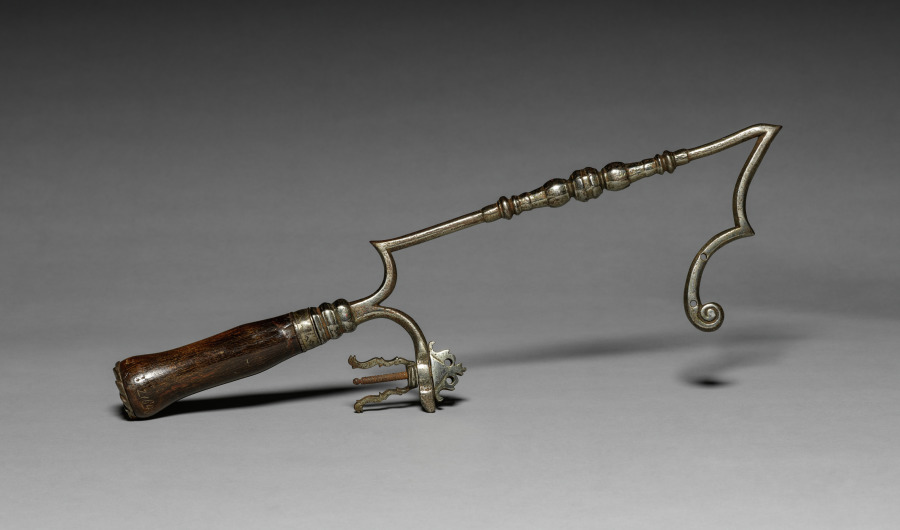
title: Hand Saw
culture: Europe, 17th century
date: 1600s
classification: Tool